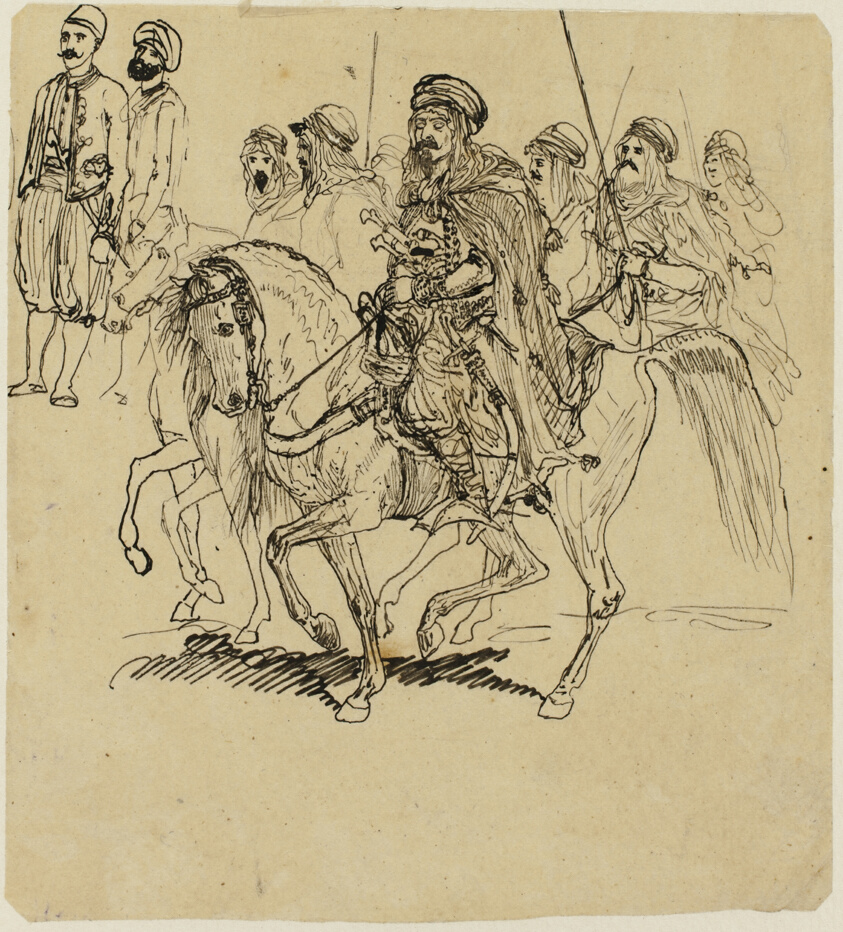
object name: Drawing and Watercolor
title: Arab Horsemen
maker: Rodolphe Bresdin (French, 1825-1885)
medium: Pen and black ink, on tan tracing paper, laid down on ivory wove paper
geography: France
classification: pen and ink drawings; drawings (visual works); prints and drawing